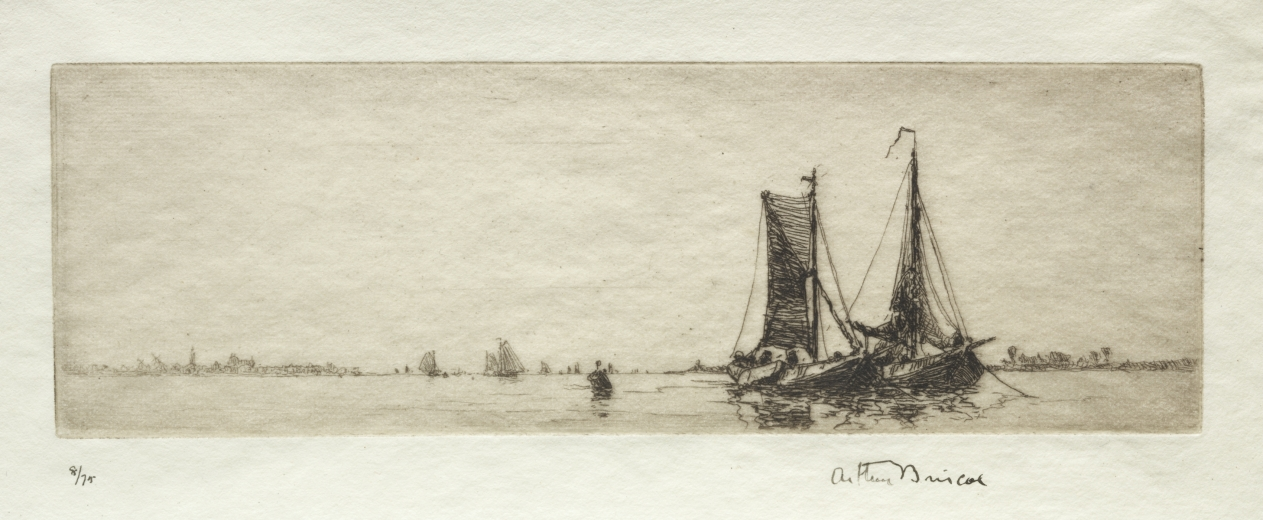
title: Sand Creek, Veere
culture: England, 20th century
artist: Arthur John Trevor Briscoe (British, 1873–1943)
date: c. 1900–1940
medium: etching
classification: Print